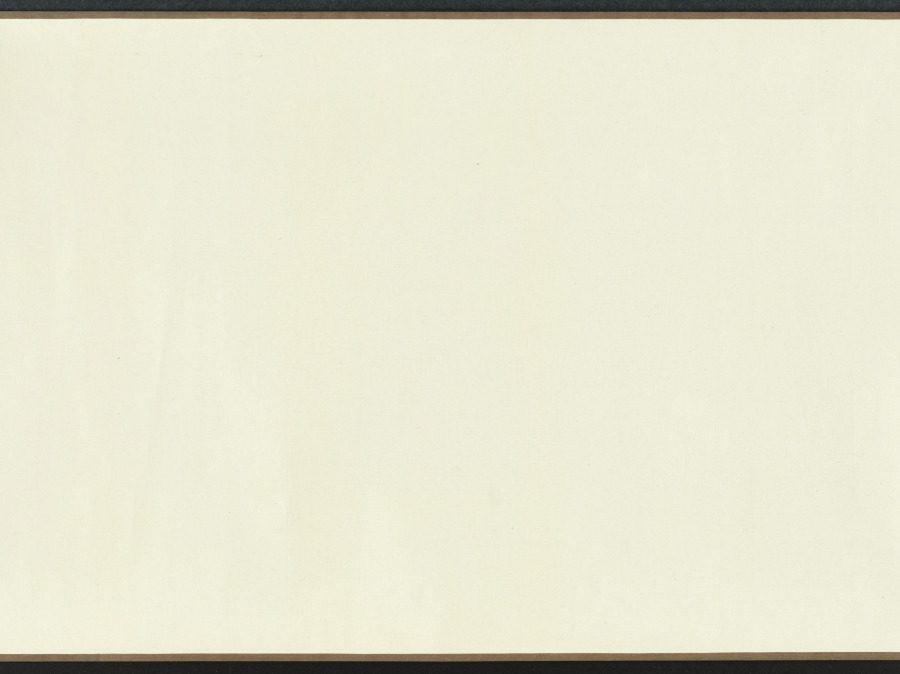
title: Ink Flowers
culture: China, Yuan dynasty (1271-1368)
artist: Zhao Zhong (Chinese, second half of the 1300s)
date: 1361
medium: Handscroll; ink on paper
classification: Painting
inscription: 寶帶同心結，香羅合歡扇。/ 繡作錦鴛鴦，雙雙為君獻。/ 薔薇露灑熏籠衣，馨香奉君君勿違。 原初并題。 [印] 趙衷原初畫記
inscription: 翠袂素羅韈，玉臺黃金盃。浩歌渡弱水。天風卷海三山開，麻姑方平為招飲，蛟宮獻舞銀濤堆。 原初并題。 [印] 雲林清趣、[印] 趙衷原初畫記。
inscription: 右用湯叔雅慶元中所寫墨花法作此卷，又效李長吉體賦詩以題之。詩與畫雖未工，要皆出於古人之餘，譬猶欲成方圓而必求其規矩之用也，識者毋誚焉！至正辛丑八月望日，東吳野人趙衷原初謹識。 [印] 趙原初、[印] 傳世清玩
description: Zhao Zhong's flowers, each paired with a poem, echo the fine-style colored flowers of the academic tradition, but instead he used only ink. Fine lines define the contours of each plant, as well as the veins within each petal and leaf. Careful ink washes give subtle modeling to the forms. The combination of lily, narcissus, and peony is unusual as the three belong to no known seasonal or symbolic system popular in the fourteenth century. Zhao’s medical training may have influenced the selection. Powdered lilies, for example, were prescribed to dispel grief, while the bark of tree peony roots was used as a treatment for various blood disorders.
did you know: This handscroll is a very rare example of ink flowers in the linear baimiao style of the fourteenth century.